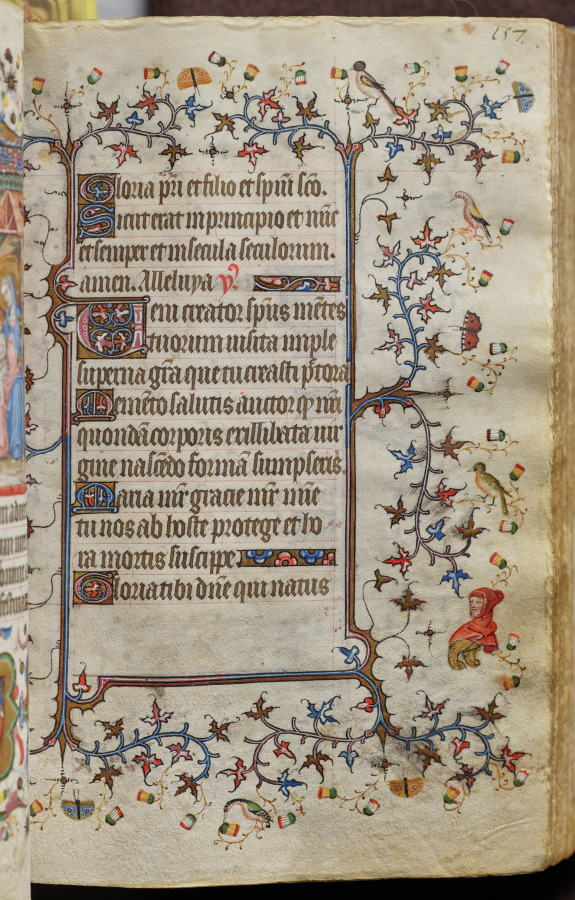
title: Hours of Charles the Noble, King of Navarre (1361-1425): fol. 79r, Text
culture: France, Paris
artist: Master of the Brussels Initials and Associates (French)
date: c. 1405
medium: ink, tempera, and gold on vellum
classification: Bound Volume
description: This precious volume was obviously highly prized by its owner, the French-born King of Navarre, who had his coat of arms painted on no less than twenty folios. Rather than directly commissioning this manuscript from a specific workshop, it seems that Charles the Noble acquired his book of hours -- perhaps ready-made for the luxury market -- while on a trip to Paris in 1404-05. A collaborative effort, six painting styles are evidenced within the pages of this codex, those of two Italians, two Frenchmen, and two Netherlanders. The painter who was responsible for the planning and decoration of the book, and who produced seventeen of the large miniatures, was a Bolognese artist known as the Master of the Brussels Initials. His principal assistant, responsible for most of the borders, was a Florentine who signed his name "Zecho" da Firenze on folio 208 verso.